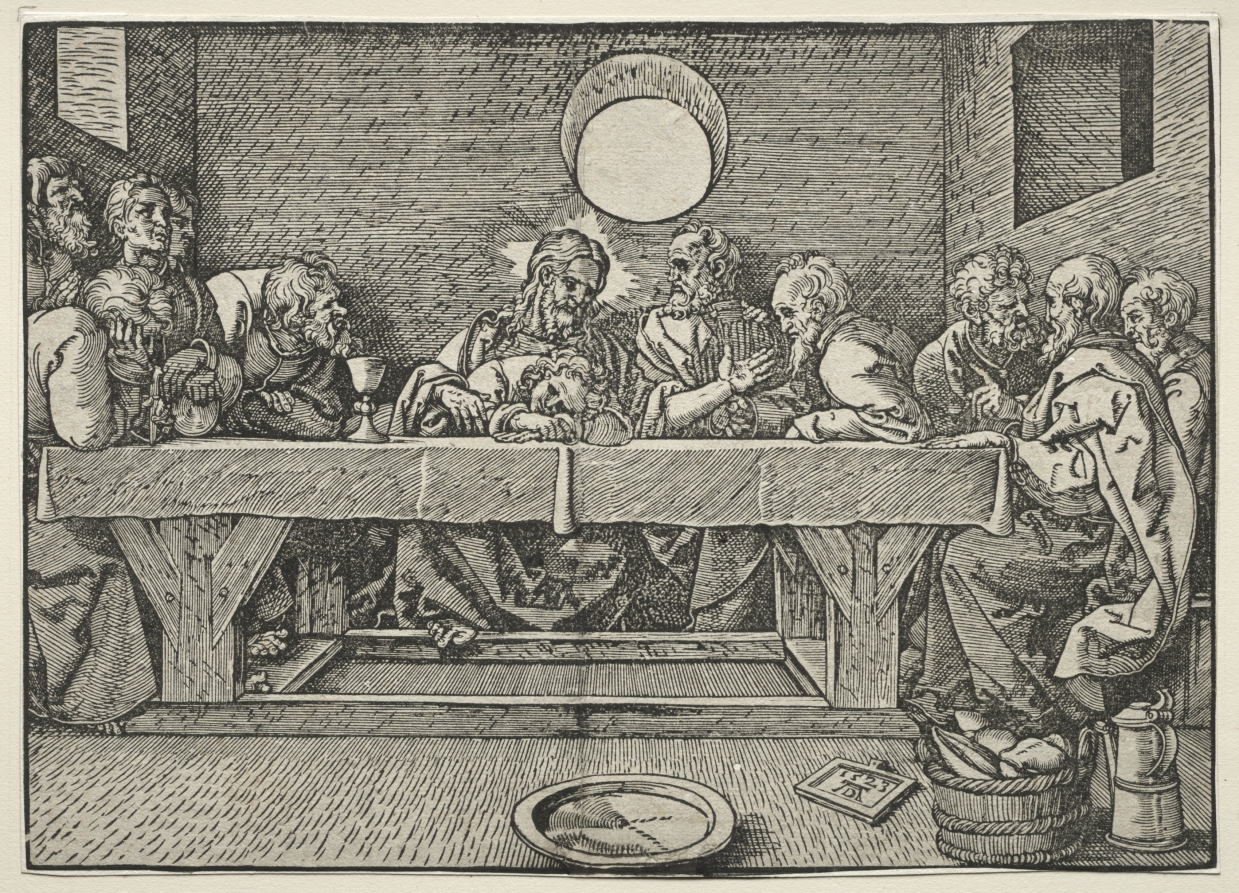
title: The Last Supper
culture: Germany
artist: Albrecht Dürer (German, 1471–1528)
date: 1523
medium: woodcut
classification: Print